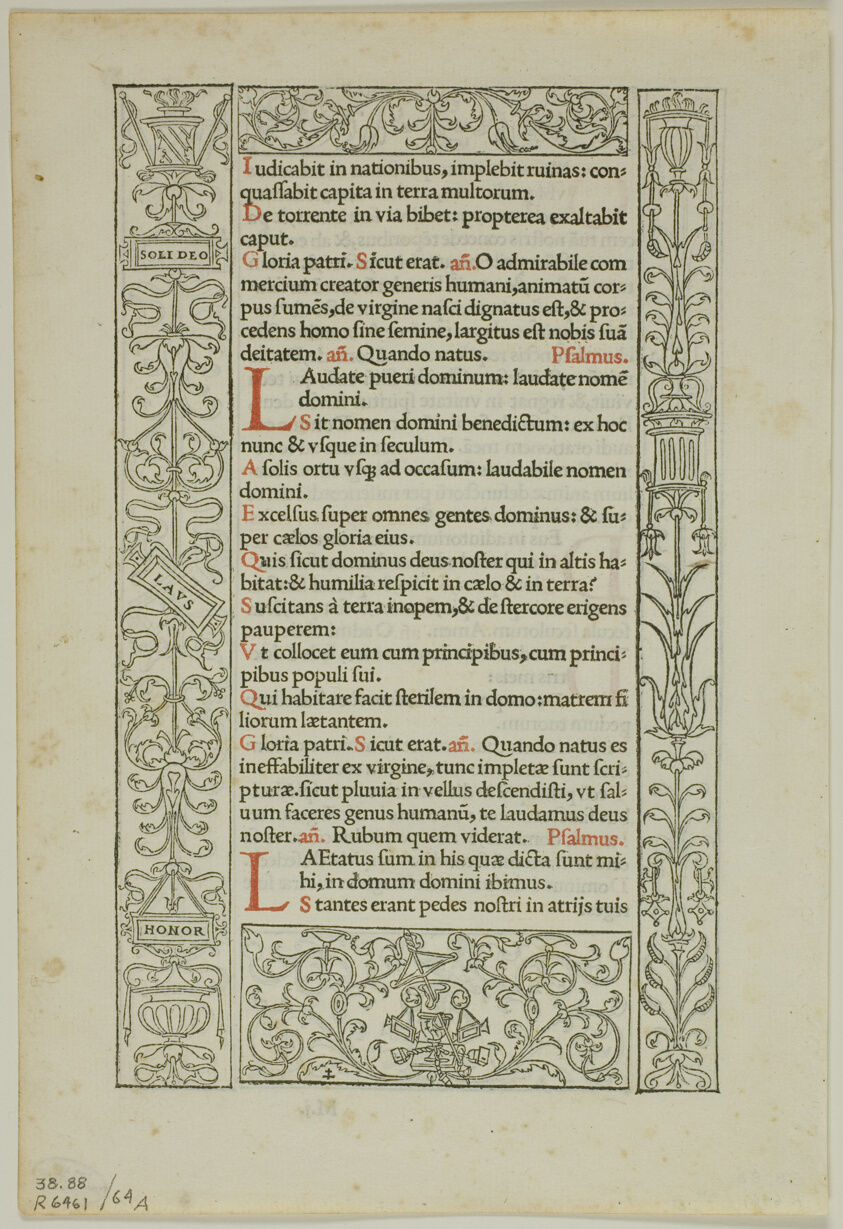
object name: Print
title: Illustration from Horae in laudem Virginis Mariae, plate 64 from Woodcuts from Books of the XVI Century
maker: Geoffrey Tory (French, c.1480-1533); assembled by Max Geisberg (Swiss, 1875-1943)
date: 1524/25, assembled into portfolio 1937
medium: Woodcut on paper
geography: France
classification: woodcut; print; prints and drawing